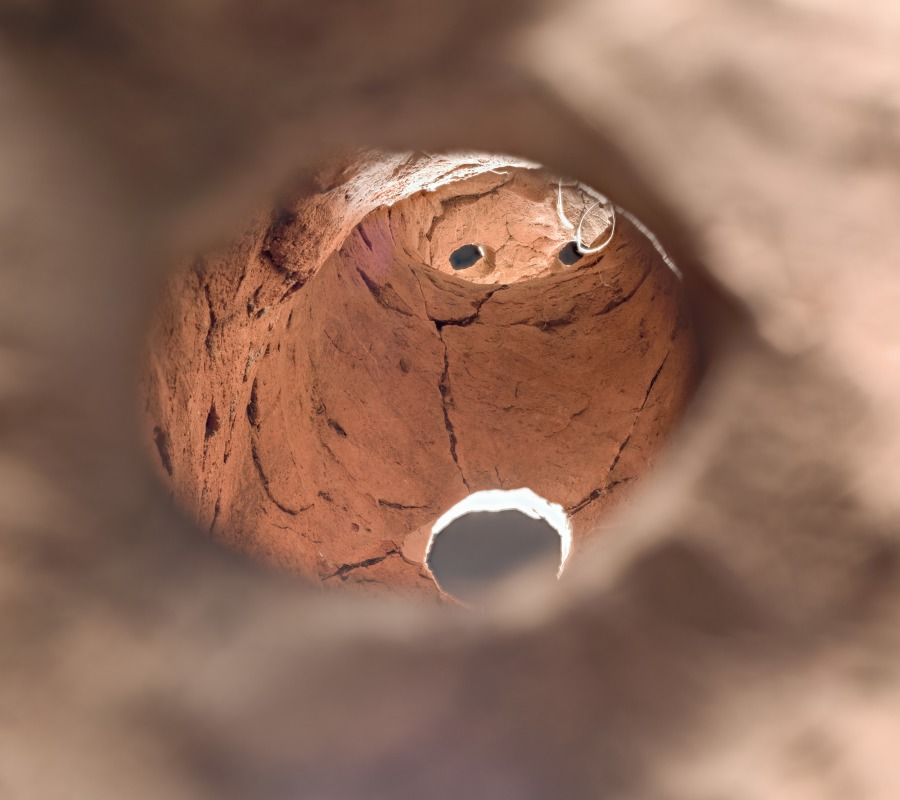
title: Haniwa Horse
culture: Japan, Kofun period (300–710 CE)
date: 400s–500s CE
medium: earthenware with traces of pigment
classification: Sculpture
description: This horse’s tack, with its round bells, resembles saddlery in fashion in Korea during the 400s–500s CE. Concurrent with mass migration from the Korean Peninsula, tombs covered with large earthen mounds similar to those on the Asian continent began to appear in Japan around the year 300 CE. Called “old mounds” (kofun), their surfaces were covered with hollow clay cylinders (haniwa). Sculptures of animals, buildings, and finally human figures followed, developing over the ensuing three centuries.